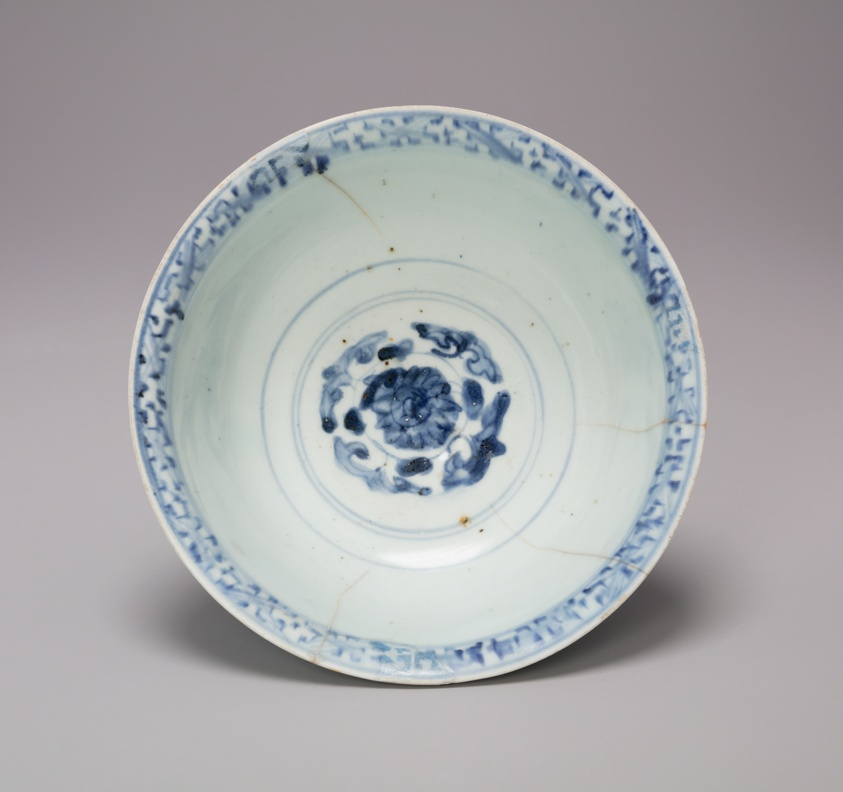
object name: Vessel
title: Bowl with Everted Rim and Scrollwork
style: annamese, vietnamese, Southeast Asian, asian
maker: Vietnam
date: 15th century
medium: Glazed stoneware with cobalt-blue underglaze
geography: Vietnam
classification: ceramics; asian art; vessel